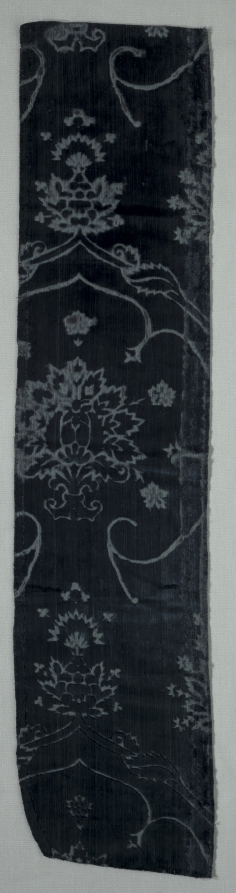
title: Velvet Fragment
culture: Italy, 15th century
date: 1400s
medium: velvet (cut and voided)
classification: Velvet